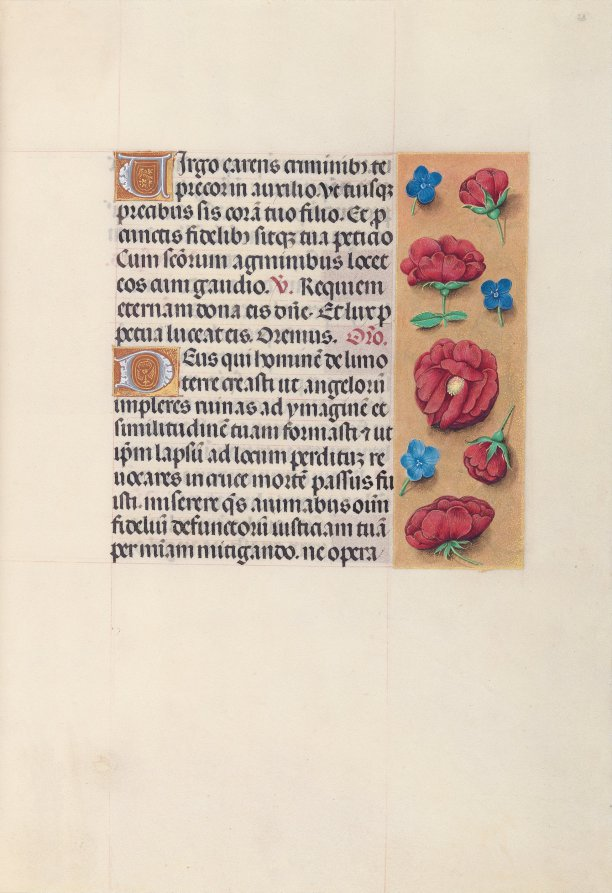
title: Hours of Queen Isabella the Catholic, Queen of Spain: Fol. 28r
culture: Flanders, Ghent and Bruges, late 15th century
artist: Master of the First Prayerbook of Maximillian (Flemish, c. 1444–1519)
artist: and Associates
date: c. 1500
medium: ink, tempera, and gold on vellum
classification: Bound Volume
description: A great lover of Flemish art, Queen Isabella treasured her many devotional books. This deluxe manuscript was created for her private devotions by highly organized and distinctly talented manuscript painters active in Ghent and Bruges. The Ghent-Bruges school represents the culmination of Flemish book painting, whose main features were the use of rich colors, illusionistic effects, a love of landscape, and a strong sense of visual narrative. Manuscripts produced by this circle of artists are renowned for their border decoration featuring a rich variety of realistically painted flowers, scrolling acanthus leaves, birds, and butterflies.